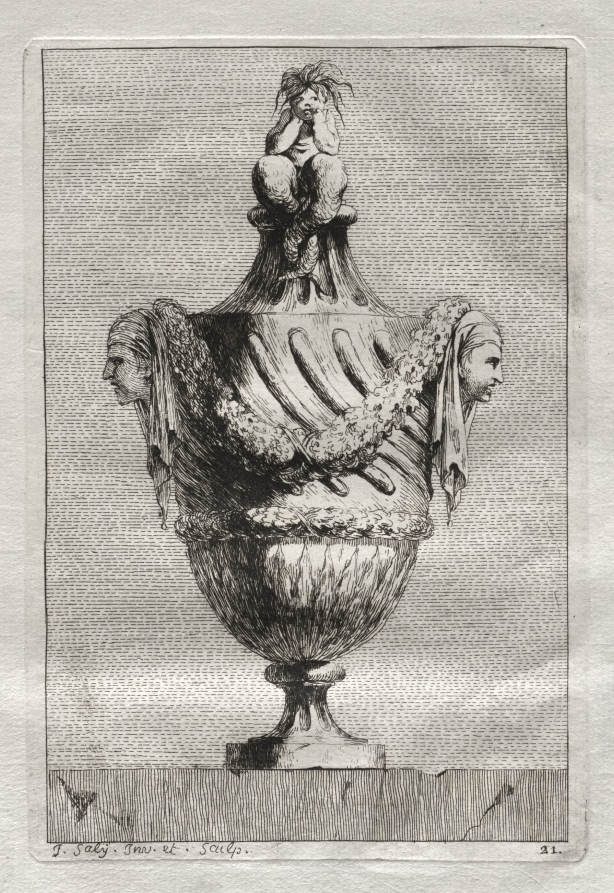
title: Suite of Vases: Plate 21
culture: France, 18th century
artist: Jacques François Saly (French, 1717–1776)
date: 1746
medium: etching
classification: Print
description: Designing ornamental vases or urns was particularly popular during the mid-18th century since the only limit to the possibilities was the imagination of the artist. Saly, a sculptor by training, was a student at the French Academy in Rome from 1740 to 1746, at which time he published a set of 30 etchings. Saly began with basic antique vase forms but deviated from classical ornament to use a rich variety of fantastic creatures for embellishment.